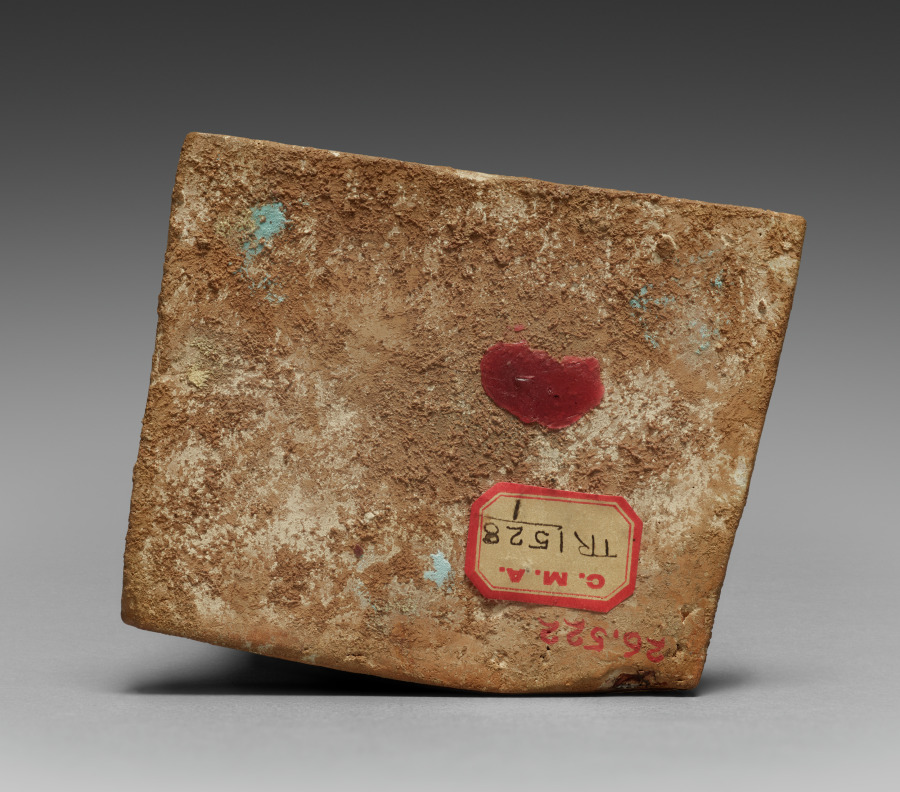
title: Female Figurine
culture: Greece, Tanagra (Boeotia)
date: 330–200 BCE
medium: molded terracotta, painted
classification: Sculpture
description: This figurine depicts an elegantly draped young woman wearing a cloak or himation over a dress called a chiton. The contrast between her sharp elbow and flowing skirts illustrates an interest in the stretch and fold of different fabrics. Originally brilliantly painted, this figurine still has traces of color such as the red hair and the white on her face. The site of Tanagra in central Greece is known for its abundance of terracotta figurines like this one made by mixing and matching different molds.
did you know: This woman’s rolled hairstyle is now called a “melon coiffure.”